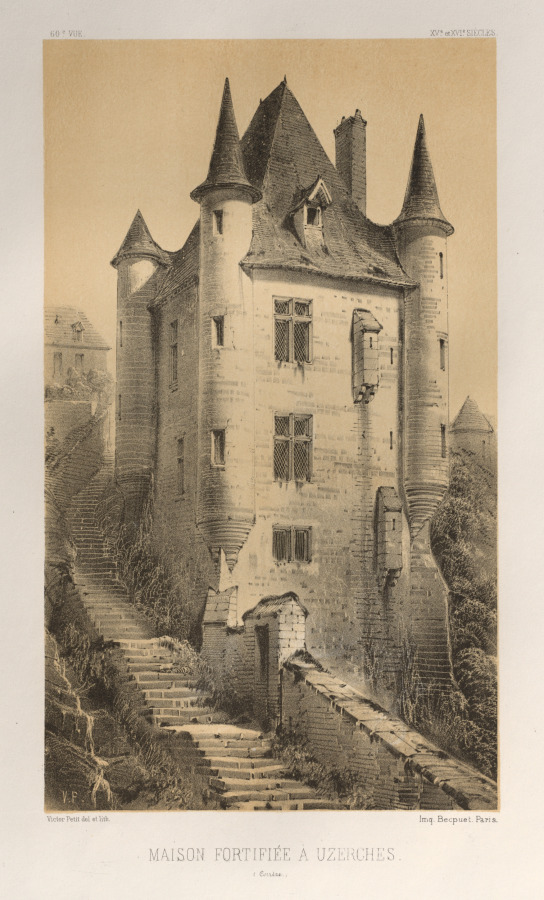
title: Architecture Pittoresque ou Monuments des XVeme. Et XVIeme. Siecles: Chateaux de France des XV et XVI Siecles: Pl. 60, Maison Fortifiée À Uzerches (Corrère)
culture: France, 19th century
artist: Victor Petit (French, 1817–1874)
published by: Charles Boivin (publisher and editor); Lith de Godard a Paris (printer)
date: 1860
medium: lithograph with tint stone, from portfolio of 100 lithographs with tint stone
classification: Print